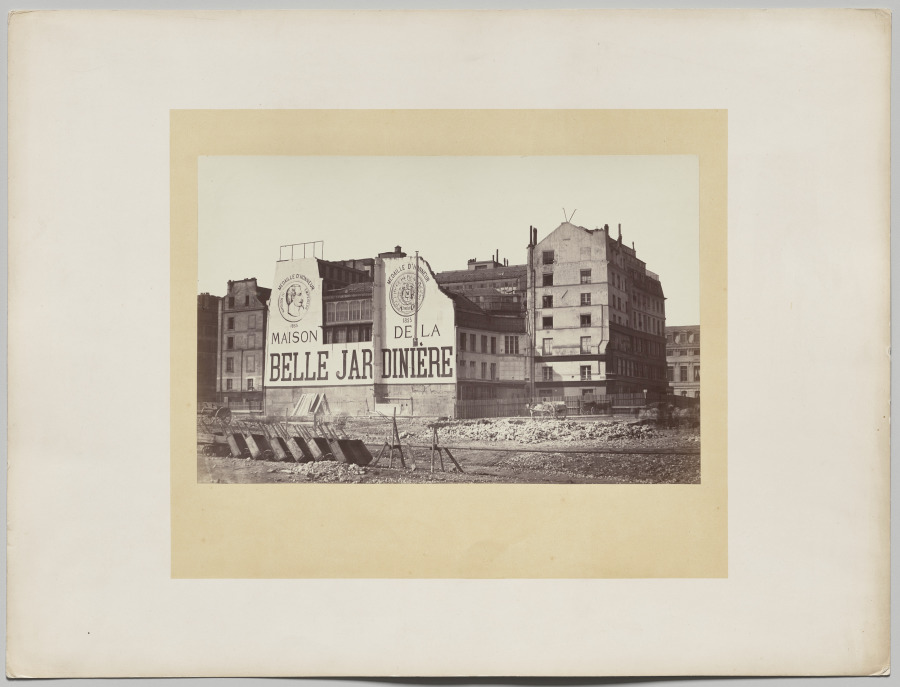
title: La Belle Jardinère: le magasin de la rue de la Cité pendant sa demolition, Paris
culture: France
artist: attributed to Charles Marville (French, 1813–1879)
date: 1864–66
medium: albumen print from collodion negative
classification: Photograph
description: In the 1850s and 1860s, Paris was transformed through a massive urban renewal program. Charles Marville photographed the demolition of the old Paris and the modern structures that replaced it. Here the old buildings of La Belle Jardinère, one of the first department stores in Paris, are being torn down to make way for a new hospital.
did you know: In the mid-1820s, the department store being demolished here introduced the idea of selling ready-to-wear clothing.